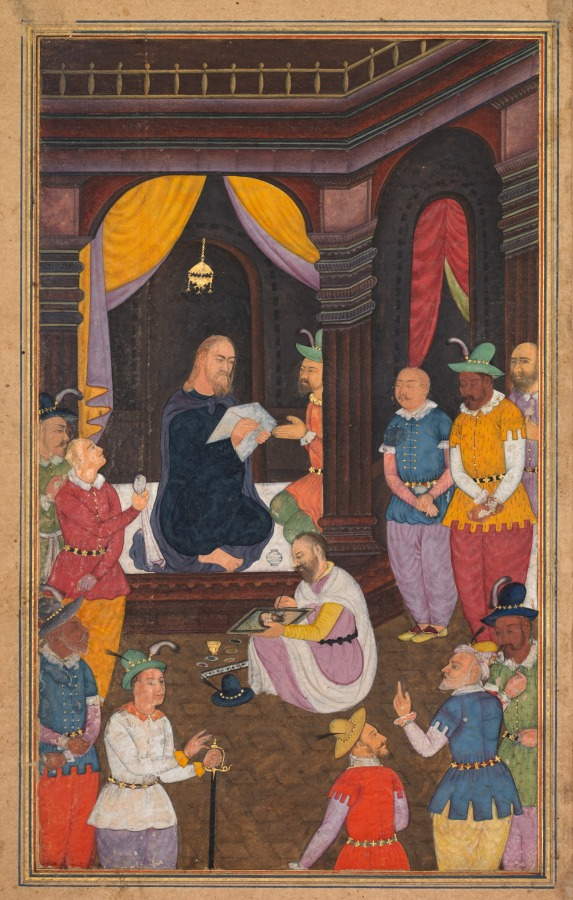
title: Jesus being portrayed by King Abgar’s painter (folio 143 recto), from a Mirror of Holiness (Mir’at al-quds) of Father Jerome Xavier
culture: Mughal India, Allahabad, made for Prince Salim (1569–1627)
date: 1602–4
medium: Gum tempera, ink, color, and gold on paper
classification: Manuscript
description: Jesus sits under a golden lamp with a cloth in his hand, while an artist sits before him, struggling to paint his portrait. The artist had been sent by his king, Abgar of Edessa, who was ill and believed the portrait would cure him. Jesus pitied the artist and pressed his face to the cloth to create a perfect impression. The miraculous cloth became known as the Mandylion and was venerated by Christians as a relic of Christ. The similarity between the names Abgar and Akbar suggests that Father Jerome included this noncanonical story in his biography of Jesus to resonate with and inspire the Mughal emperor.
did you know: Artist’s pigments are arranged in shells next to the brass cup for water.